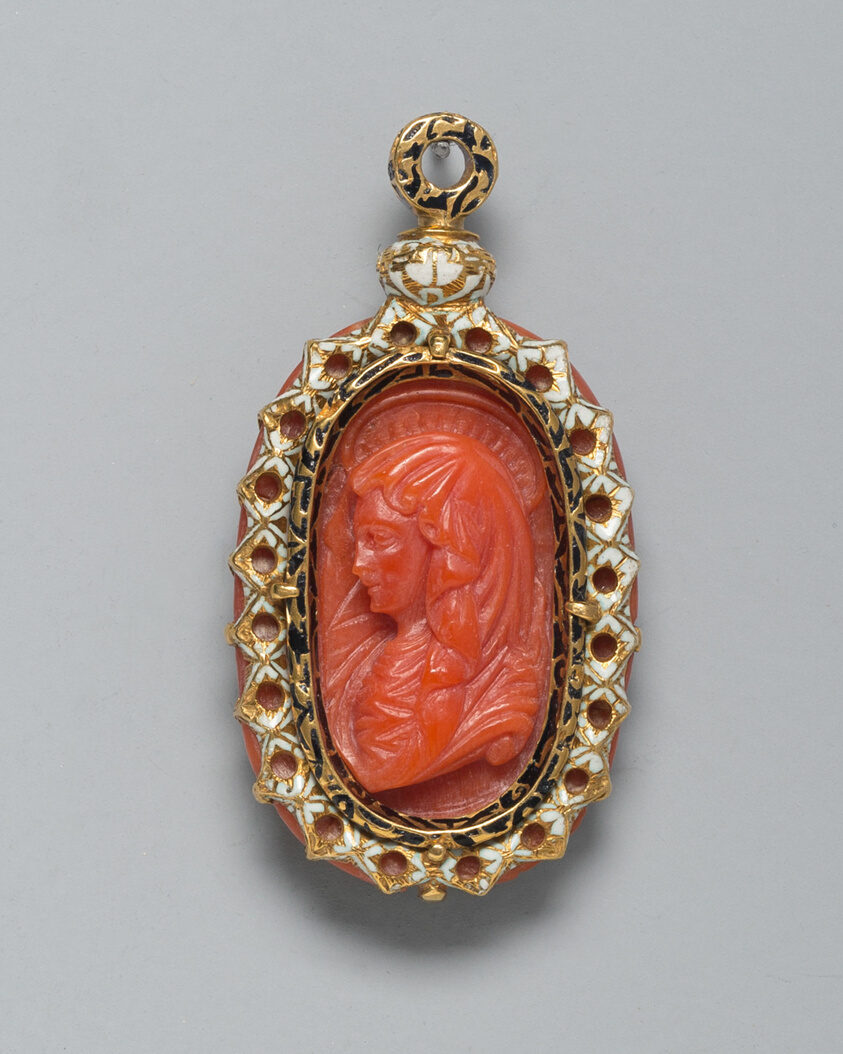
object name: Costume and Accessories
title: Double-Sided Pendant with the Virgin and Christ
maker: Italian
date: 18th century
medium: Gold, enamel, and coral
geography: Italy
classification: pendant (jewelry); jewelry; european decorative arts; costume